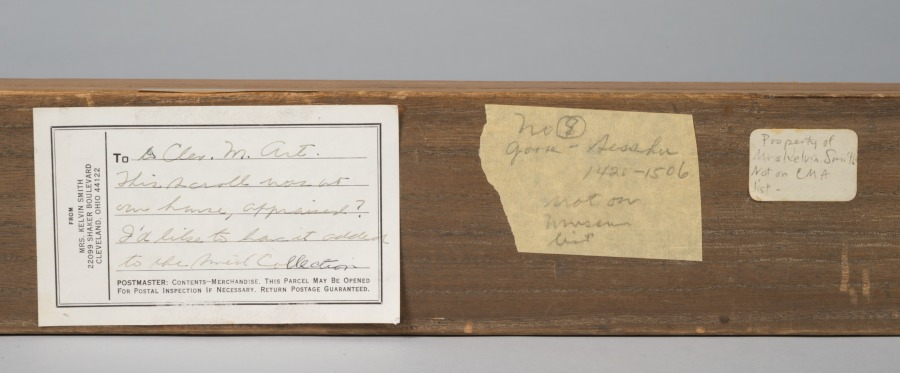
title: Goose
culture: Japan, Edo period (1615–1868)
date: c. 1615–99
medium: hanging scroll; ink on paper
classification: Painting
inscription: spurious seal of Sesshu, lower right.